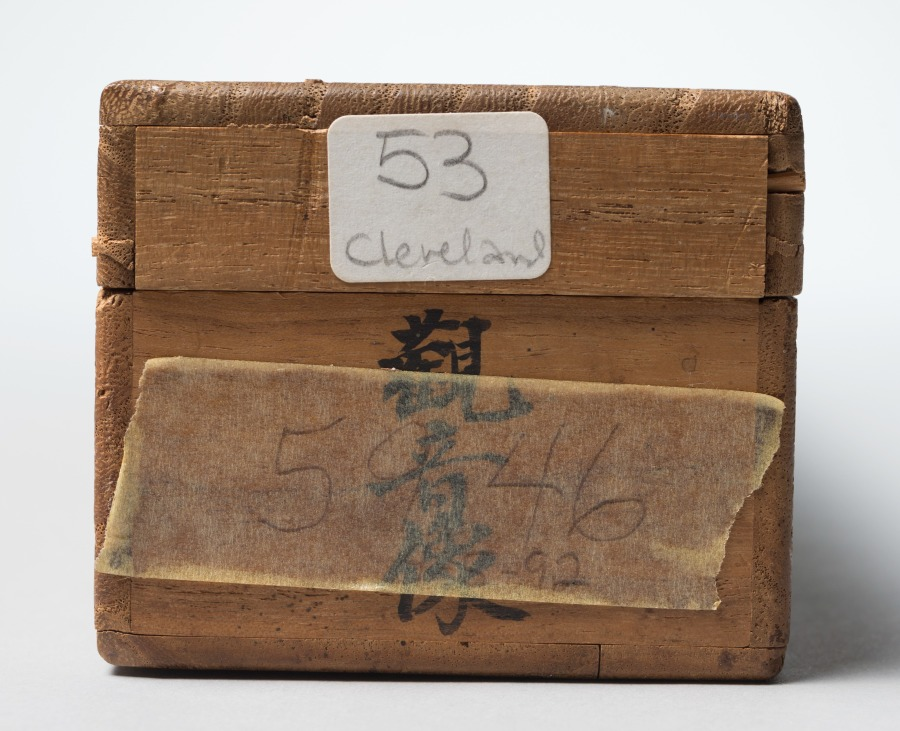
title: White-Robed Guanyin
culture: China, Yuan dynasty (1271-1368)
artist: copy after Jueji Yongzhong (Chinese, active around 1300)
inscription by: Zhongfeng Mingben (Chinese, 1263–1323)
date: late 1200s–early 1300s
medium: hanging scroll; ink and gold on silk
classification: Painting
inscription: Inscription: one of the 84,000 painted by the priest Insei.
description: The original model for this ink drawing of Guanyin, the bodhisattva of infinite compassion (Avalokiteshvara in Sanskrit), is CMA 1978.47.1. This drawing is a later copy with the same image of the White-Robed Guanyin, but in reverse. The inscription above reads: one of the 84,000 painted by the priest Insei. The inscription seems to indicate that the Japanese priest Insei repeatedly copied the image of the bodhisattva in an act of piety and to accumulate merit, as is promised in the Lotus Sutra for anyone who paints images of the Buddha, they “will achieve the Buddha path.” The priest’s name and seal need further study and identification.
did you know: The bodhisattva's face and halo were delicately painted in gold.